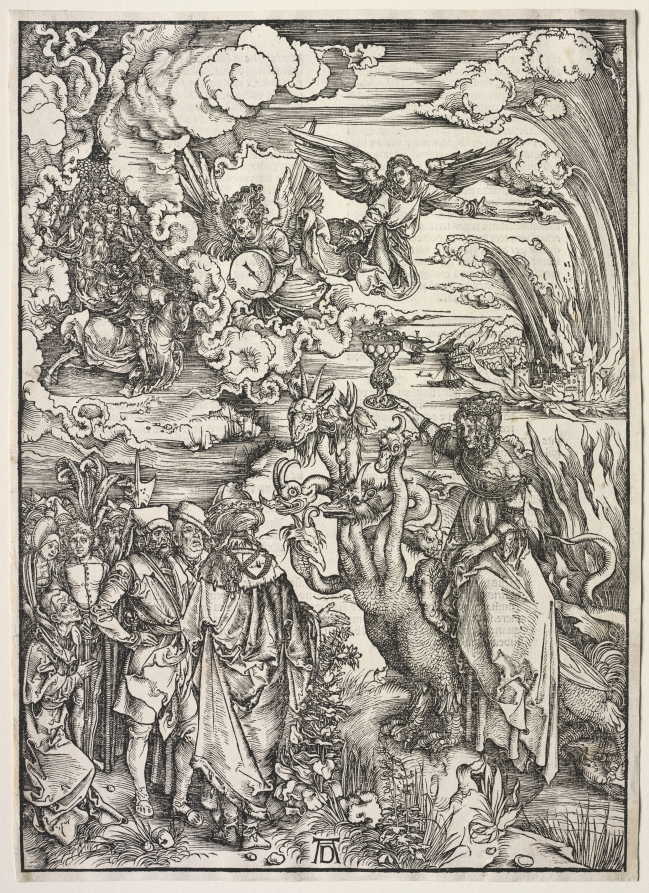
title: Revelation of St. John: The Woman of Babylon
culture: Germany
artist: Albrecht Dürer (German, 1471–1528)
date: 1511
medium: woodcut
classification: Print